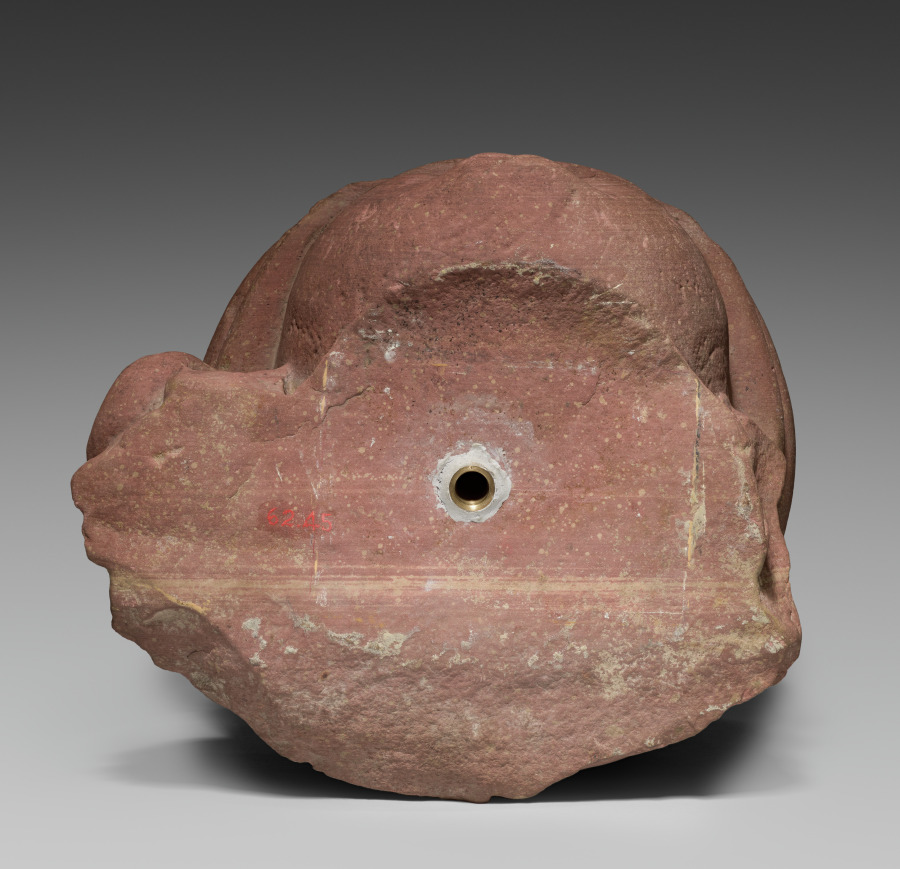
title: Head of a Yaksha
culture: Northern India, Uttar Pradesh, Mathura, Shunga period (185–78 BCE)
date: c. 125 BCE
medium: mottled red sandstone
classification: Sculpture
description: Colossal statues of yakshas, male divinities who personify the productive forces of nature, were especially popular in the northern Indian region around the ancient city of Mathura. They were installed in shrines in parks and gardens, often associated with extraordinary trees. The red sandstone is from a nearby quarry, called Sikri.